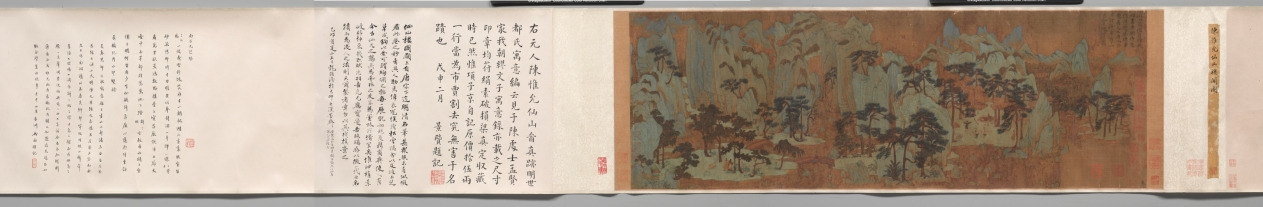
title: Mountains of the Immortals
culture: China, Yuan dynasty (1271-1368)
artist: Chen Ruyan (Chinese, c. 1331–1371)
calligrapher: Ni Zan (Chinese, 1301–1374)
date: 1300–1370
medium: Handscroll; ink and color on silk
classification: Painting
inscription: 1 inscription, 3 colophons, and 37 seals: 1 inscription, dated 1371, by Ni Zan 倪瓚 (1301-1374); 17 seals of Xiang Yuanbian 項元汴 (1525-1590); 4 seals of Chu Chih-ch'ih (late Ming Dynasty); 1 seal of Liang Qingbiao 梁淸標 (1620-1691); 1 seal of Gao Shiqi 高士奇 (1645-1704); 4 seals of Lu Xinyuan 陸心源 (1834-1894); 1 colophon, dated 1908, and 5 seals of Jing Xian 景贒; 1 colophon, dated 1915, by Lung Yu; 1 colophon, dated 1932, and 2 seals of Wu Mei; 3 seals unidentified.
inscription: 仙山圖， 陳君惟允所畫。 秀潤清遠， 深得趙榮祿筆意。 其人已矣， 今不可復得。 辛亥十二月二日倪瓚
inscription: Colophon by Jing Xian 景贒: The preceding Land of Immortals is an authentic work of the Yuan master, Chen Weiyun 陳惟允. According to the Yu yi bian 寓意編 by Du Mu 都穆of the Ming Dynasty, the painting was seen at the home of Chen Mengxian 陳孟賢 [c. 1500], a hermit. It is also recorded in Yu yi lu 寓意錄 of the present [Qing] era. The dimensions and the seals are all correct. When the painting went into the possession of Liang Qingbiao 梁淸標, the silk was already quite dilapidated. The only thing now missing, however, is the one line of writing by Xiang Zijing 項子京 [Xiang Yuanbian 項元汴] who records the original price he paid, being fifteen taels of silver. This must have been cut off by the dealer, which nevertheless did no harm to a masterpiece such as this. Jing Xian recorded this in the second month of the maoshen year [1908].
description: The landscape in deep green tones offers a view into a secluded mountain valley, populated by ancient figures surrounded by deer and cranes, all under high pine trees. A red-robed immortal in the air steers his crane toward the paradise land. This idyllic scene was presumably created amid the tumultuous transition from the Yuan to the Ming dynasty. Chen from Suzhou supported major rebel leaders, first Zhang Shicheng (1321–1367) with his base in Suzhou and then his rival Zhu Yuanzhang in Nanjing, after the latter had established the Ming dynasty. Chen was executed in 1371.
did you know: Such blue and green landscapes often evoke nostalgia for the idealized ancient times.